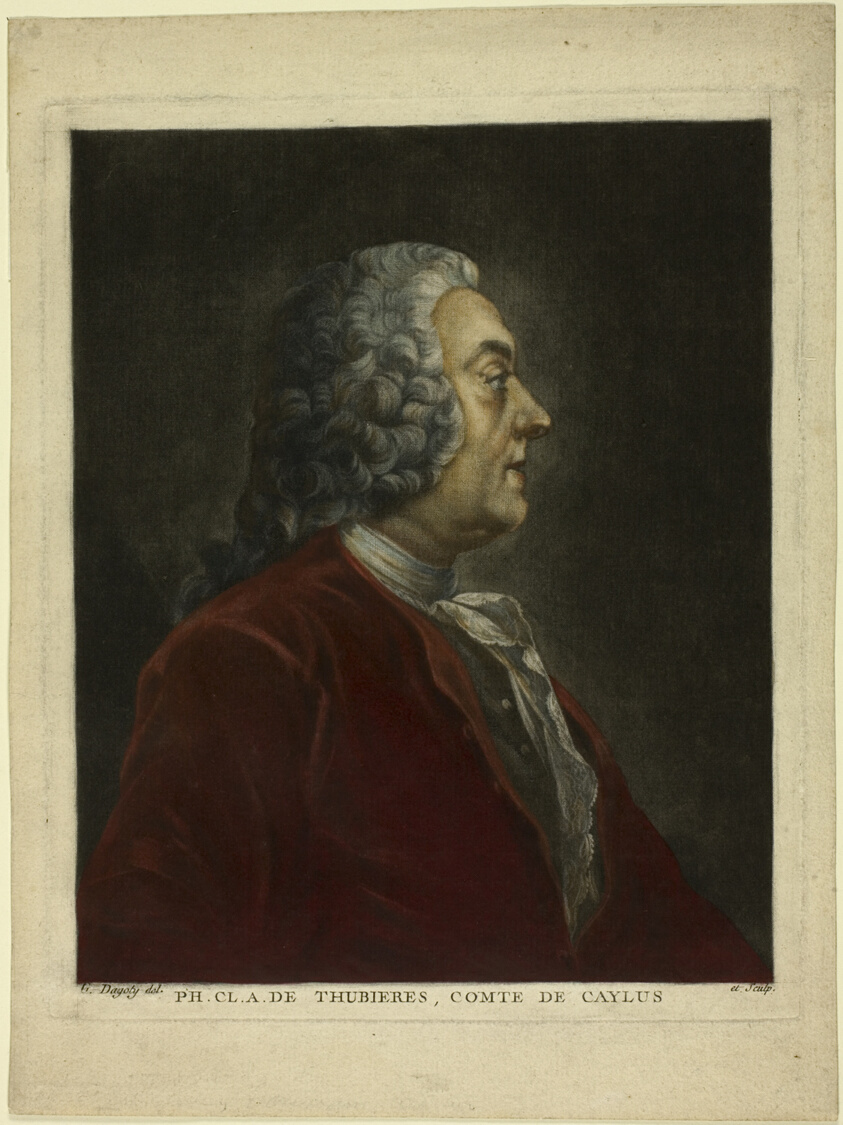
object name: Print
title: Portrait of Philippe Claude André de Thubières, Comte de Caylus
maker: Jean B. A. Gautier d'Agoty; French, 1740-1786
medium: Color mezzotint on paper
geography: France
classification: mezzotint; print; prints and drawing